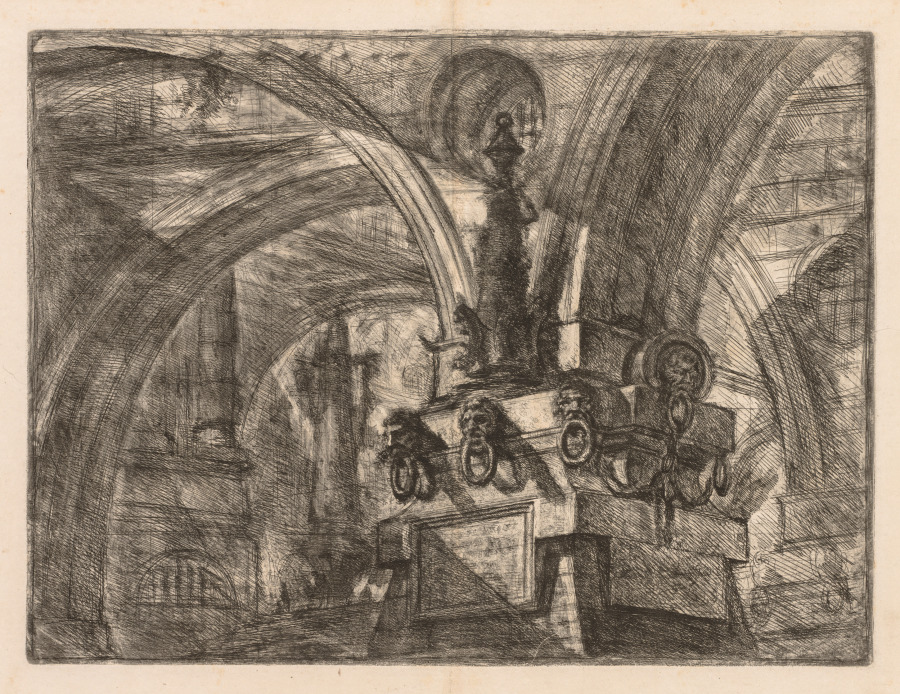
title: The Prisons: Round Arches Springing from a Square Column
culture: Italy, 18th century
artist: Giovanni Battista Piranesi (Italian, 1720–1778)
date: 1745–1750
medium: etching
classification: Print